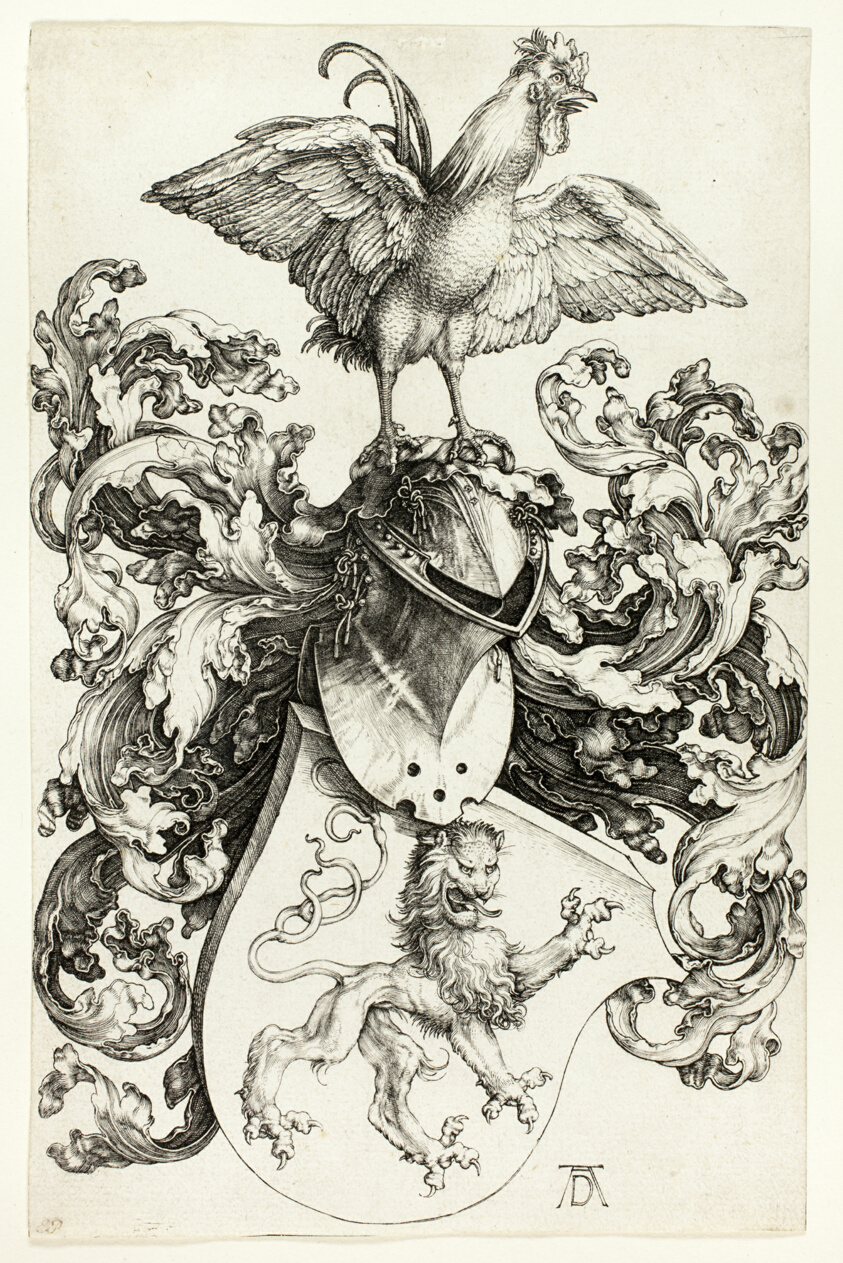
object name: Print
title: Coat of Arms with Lion and Rooster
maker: Albrecht Dürer (German, 1471-1528)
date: c. 1503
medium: Engraving in black on ivory laid paper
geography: Germany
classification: engraving; print; prints and drawing; paper